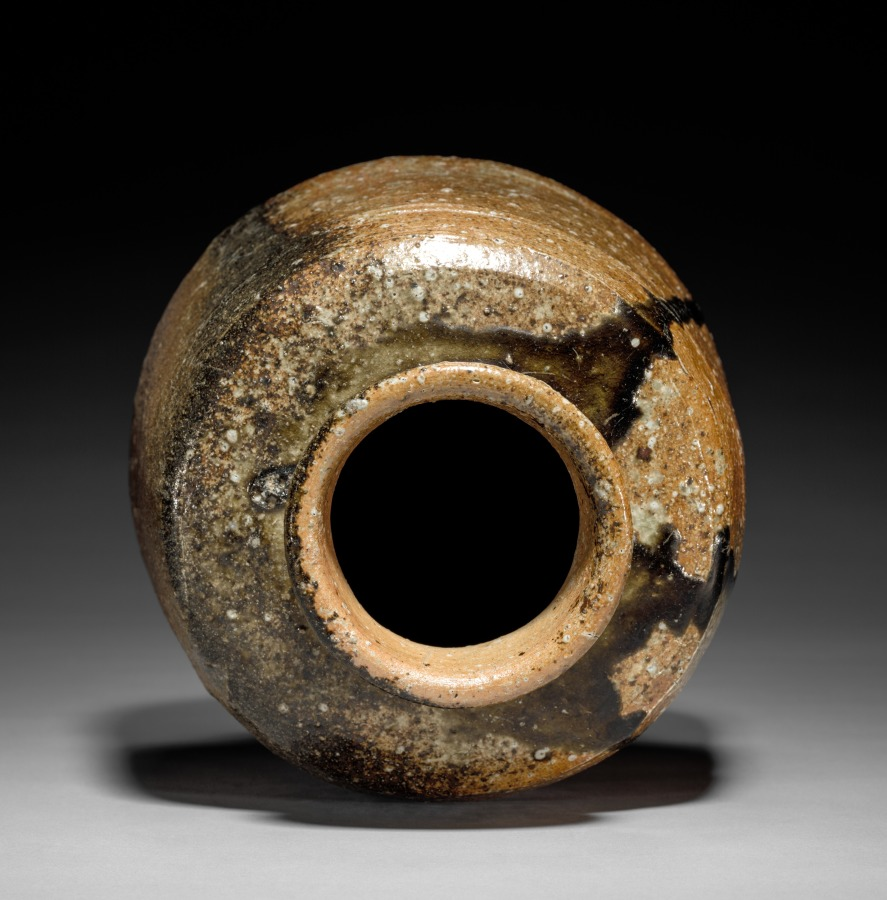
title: Tea Storage Jar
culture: Japan, Momoyama period (1573–1615)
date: 1573–1615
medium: glazed stoneware (Shigaraki ware)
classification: Ceramic